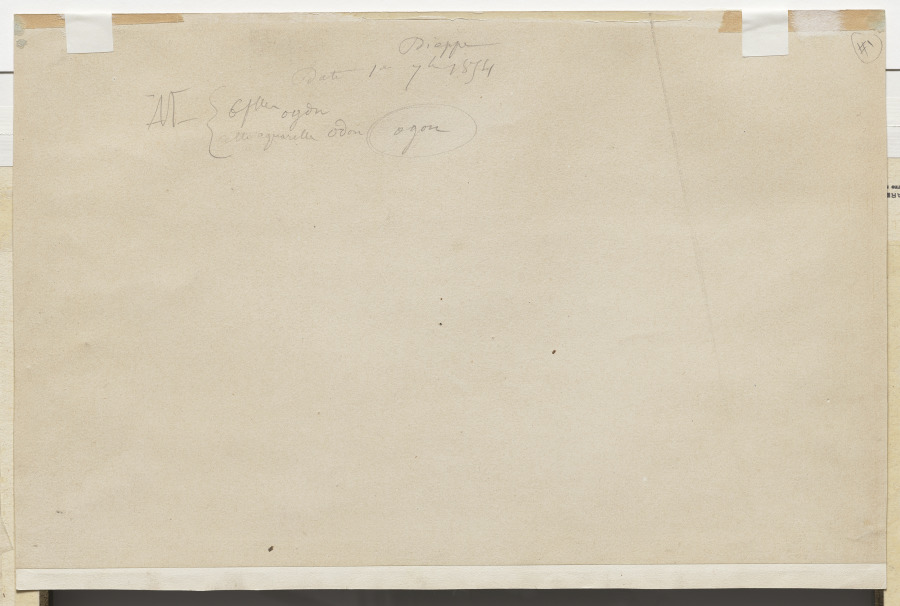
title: Two Boats at the Harbor of Dieppe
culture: France, 19th century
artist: Eugène Delacroix (French, 1798–1863)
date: 1854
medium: watercolor and pencil on paper laid down on board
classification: Drawing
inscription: inscribed, at bottom center, in brown ink: 1er 7b [septembre]; inscribed along lower margin of board, in pencil: 1854 [illeg.]; at lower left, in black ink: stamp of Marcel Louis Guérin [1873-1948; Lugt 1872b]; at lower right, in red ink: Delacroix studio stamp [Lugt 838a]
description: In this late drawing, Eugène Delacroix used spare layers of watercolor to record two large boats floating in a harbor, contrasting the bright tones of the French flags flying on both with the subdued hues of the water surrounding them. The artist recorded the scene during one of five stays in Dieppe, a coastal town that became a popular vacation destination after it was connected to Paris by train in 1848. Delacroix was passionate about depicting the sea and its environs and created numerous variations of this subject over the course of about a decade.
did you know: Eugène Delacroix described making this drawing in his journal, writing on September 1, 1854: “Drew from my window, before dinner, some boats.”